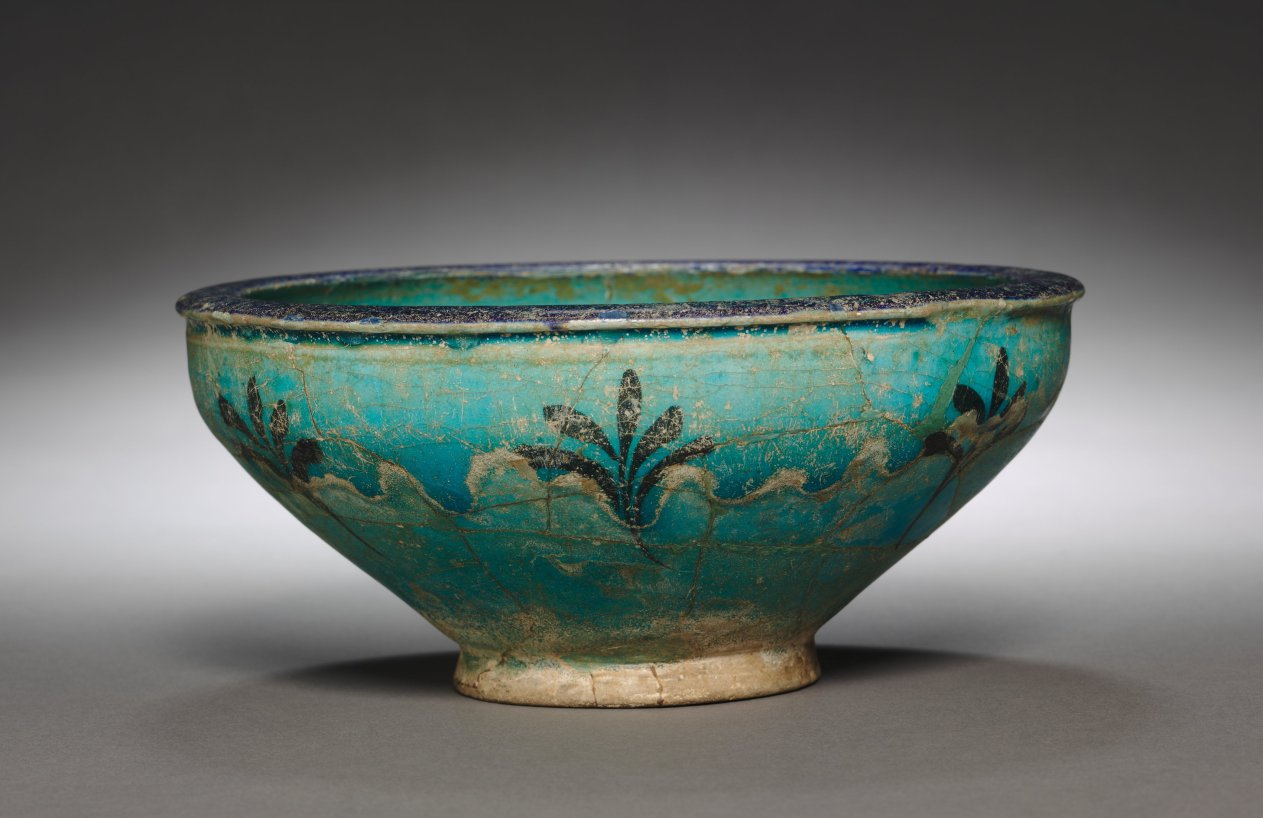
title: Bowl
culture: Iran, Kashan, Seljuq period of Iran (1037–1194)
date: early 1200s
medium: earthenware with underglaze-painted and incised design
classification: Ceramic